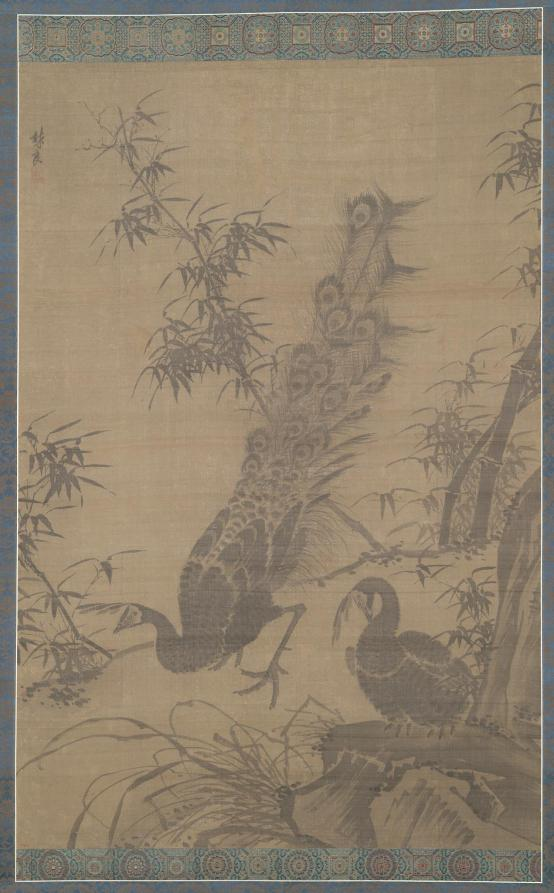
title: A Pair of Peafowl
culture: China, Ming dynasty (1368–1644)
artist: Lin Liang (Chinese, 1416–1480)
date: late 1400s-early 1500s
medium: hanging scroll, ink on silk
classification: Painting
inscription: 林良. [印] 以善圖書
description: The peacock, identified by the flamboyant tail, is paired with a female peahen to its right. In lowering her head, the hen seems to show respect to the male peacock. With his articulate brushstrokes and strong contrasting tones, Lin Liang’s representation in black ink appears as vivid as Yin Hong’s colorful peacock (1974.31). The painter skillfully uses wet and dry ink as well as broad and thin washes to represent the plumage of the bird. The surface of the rocks, depicted in powerful sweeping strokes, recalls the landscape painting style of the Zhe School, which specialized in expressive brushwork.